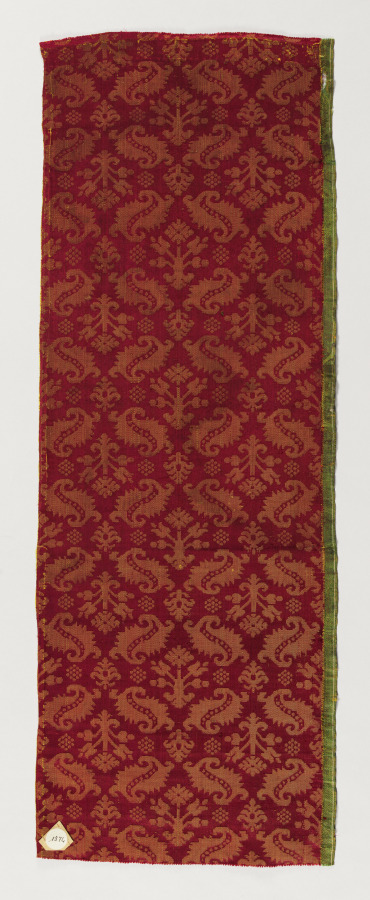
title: Silk Fragment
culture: Italy or Spain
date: 1600s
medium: damask: silk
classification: Textile